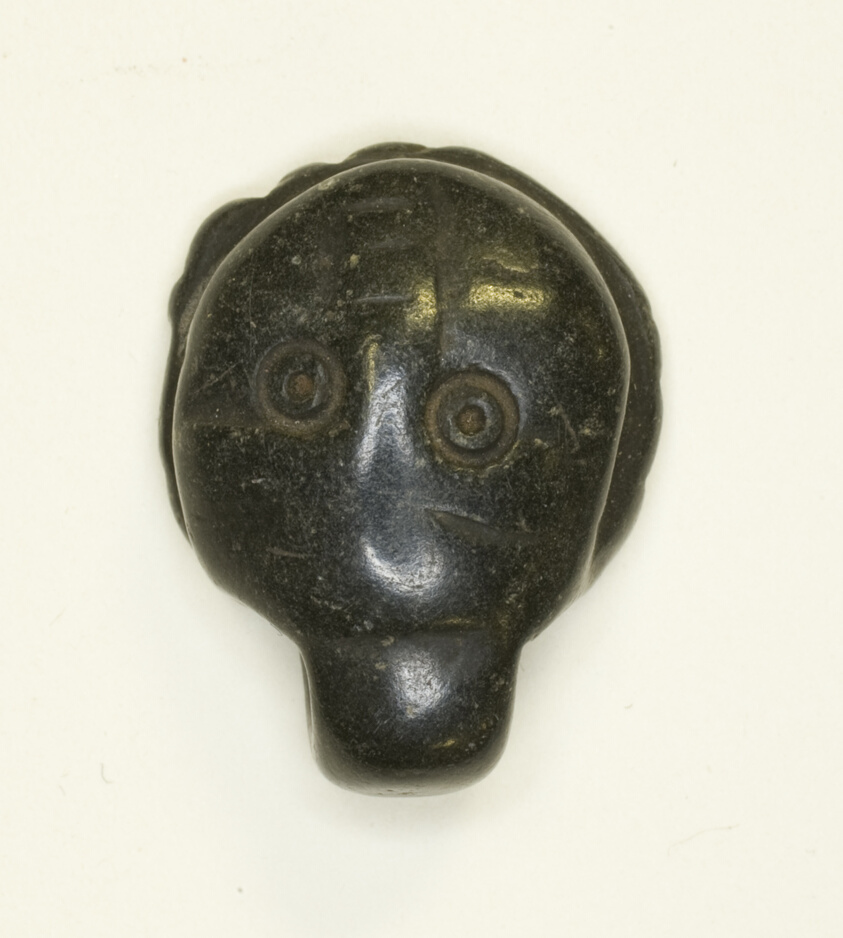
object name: Costume and Accessories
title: Face Amulet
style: coptic (period)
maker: Egyptian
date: Coptic Period (4th–7th century)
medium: Stone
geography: Egypt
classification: amulet; stone; jewelry; ancient art; costume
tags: faces